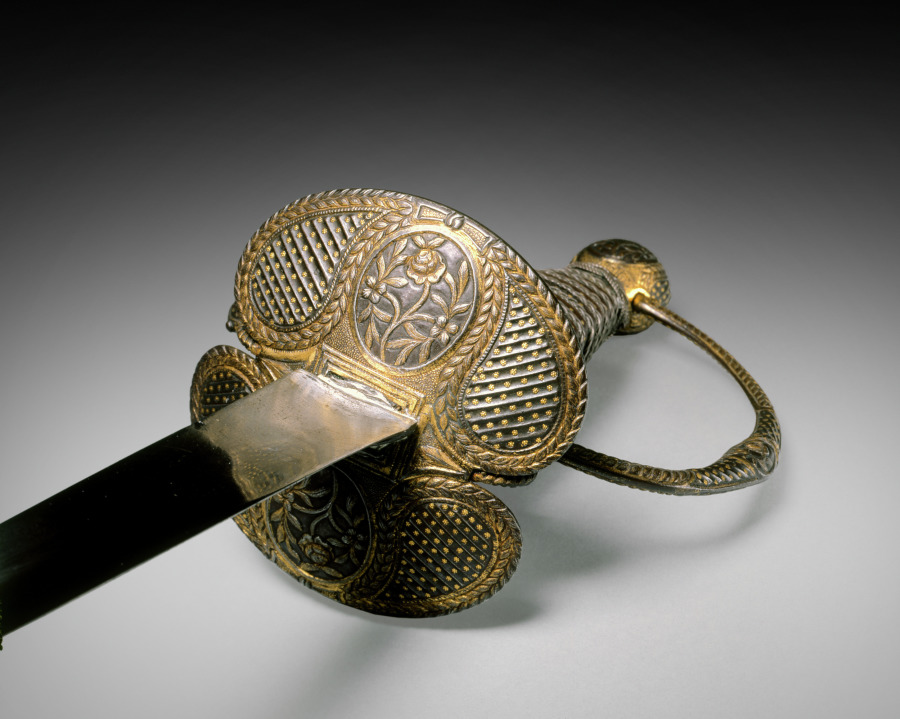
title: Small Sword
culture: France, Paris (?), 18th century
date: c. 1780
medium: forged steel blade; partially gilt and russet steel hilt; steel wire, leather bands, wood core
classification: Arms and Armor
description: During the 1700s, the small-sword emerged as a light, quick weapon. Like the rapier it was carried by unarmored civilians, the noblemen of the upper classes. Over time this delicate sword became more an accessory of male attire than a weapon essential to life and death. The sword hilt, which shows even when the blade is sheathed, became the ground for elaborate decoration. These small-swords thus represent the final stage in the evolution of the sword, from the edged weapons of antiquity to the elegantly refined blades of the 1700s and 1800s.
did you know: The fashion among gentleman for wearing small-swords with everyday attire began to wane by the end of the 1700s with the exception of the military dress sword.